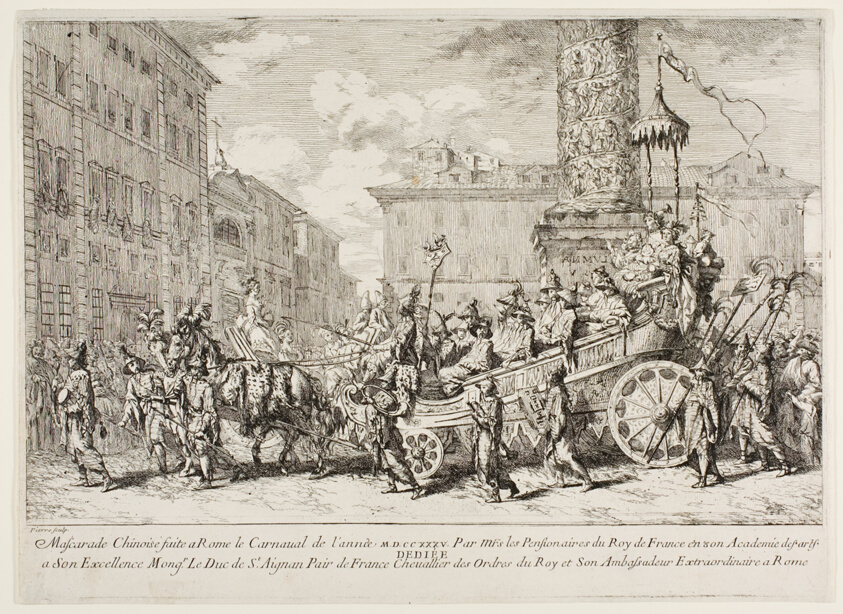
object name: Print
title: The Chinese Mascarade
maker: Jean Baptiste Marie Pierre (French, 1713-1789)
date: 1735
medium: Etching in black on ivory laid paper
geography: France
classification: etching; print; prints and drawing